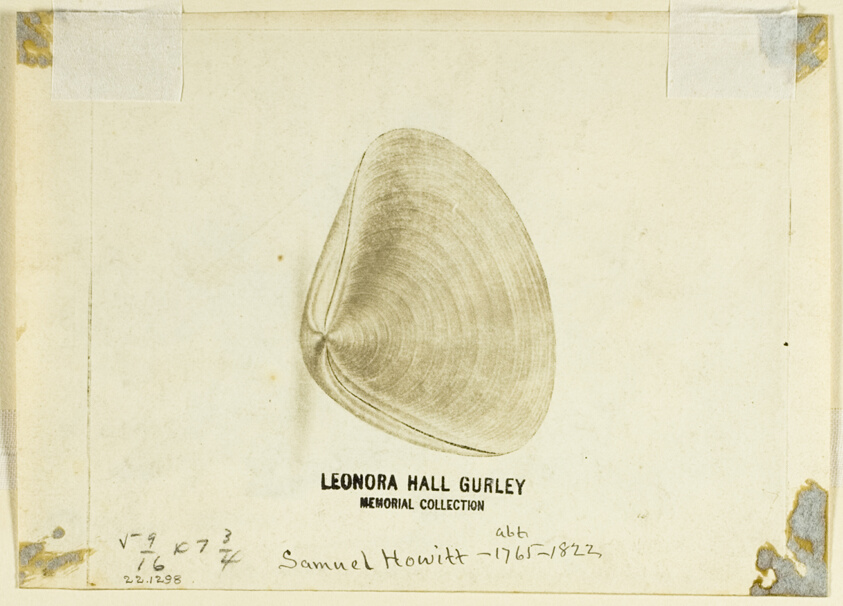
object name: Drawing and Watercolor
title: Seamen on the Whale Fishery Killing a Polar Bear (recto); Shell (verso)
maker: Recto attributed to Samuel Howett (English, c. 1765-1822); Verso by Unkown Artist (British, 19th c.)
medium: Pen and brown ink, with brush and gray and brown wash, over graphite (recto), and print (verso), on ivory wove paper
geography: England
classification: ink or chalk wash; drawings (visual works); prints and drawing